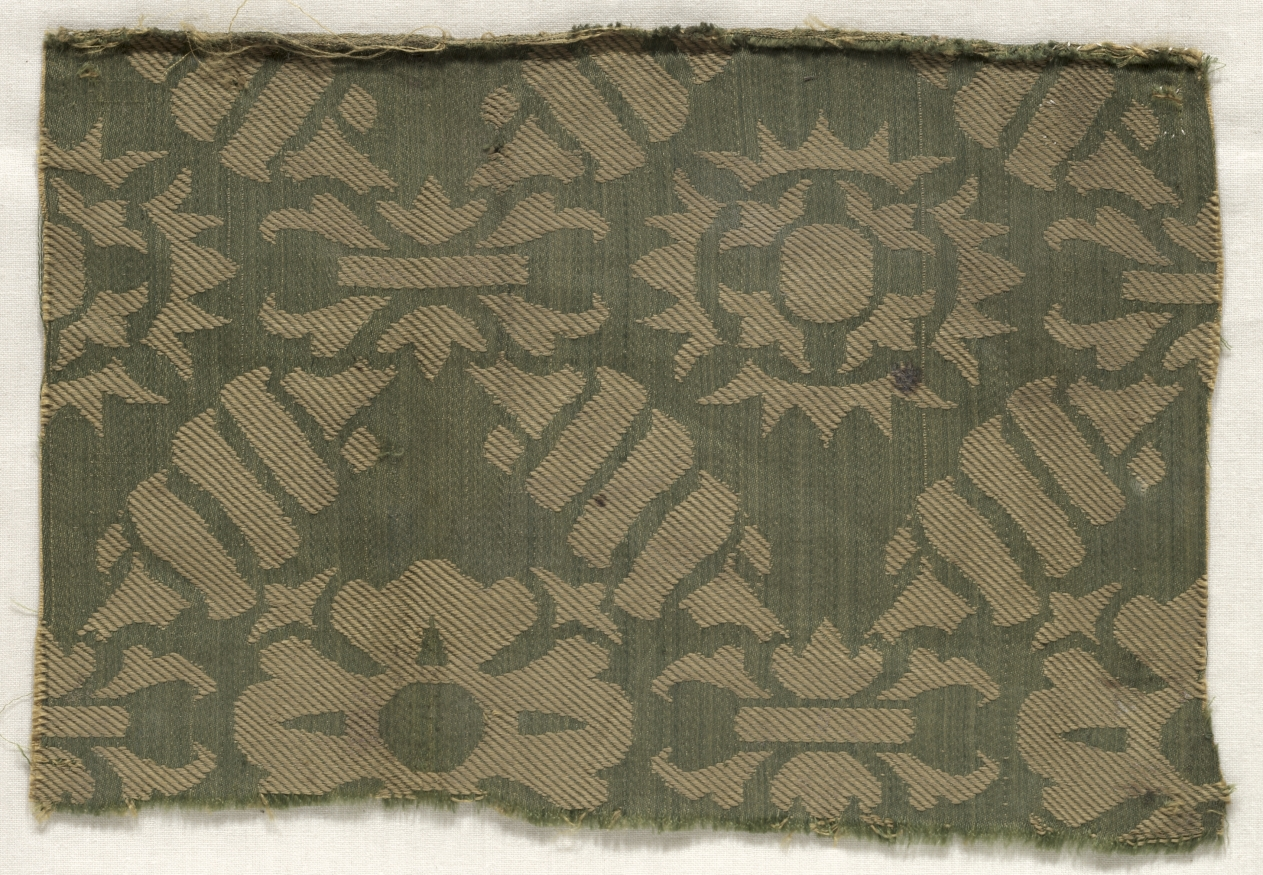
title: Fragment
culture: Spain, late 16th century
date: late 16th century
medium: silk damask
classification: Textile